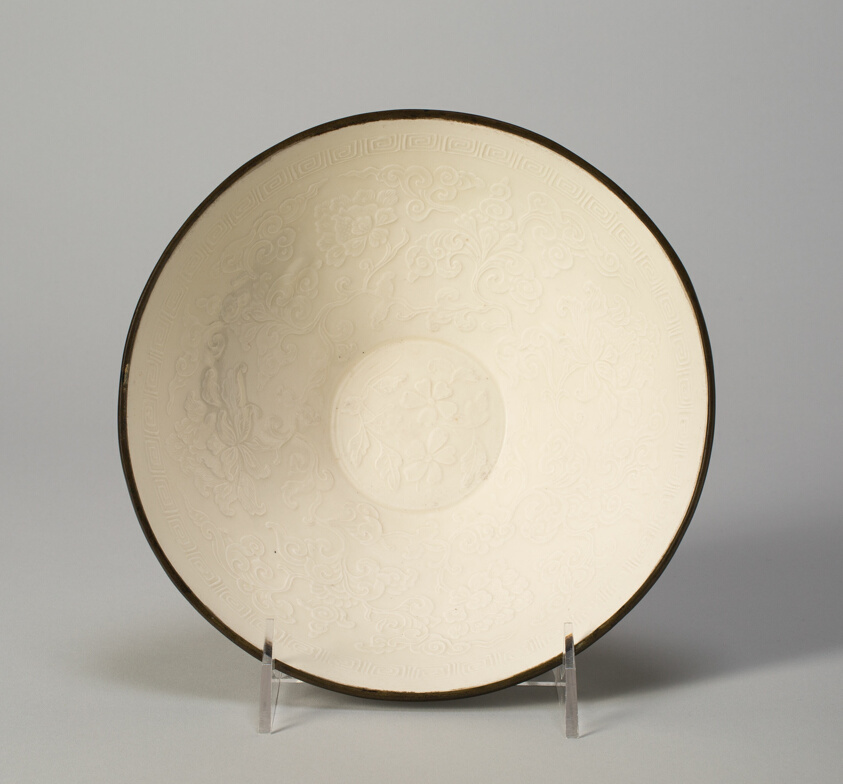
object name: Vessel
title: Bowl with Stylized Peony Spray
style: Chinese (culture or style)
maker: China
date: Jin dynasty (1115–1234), 12th century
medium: Ding ware; porcelain with underglaze mold-impressed decoration; metal rim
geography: China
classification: bowl; porcelain; dish (vessel); asian art; ceramics; vessel